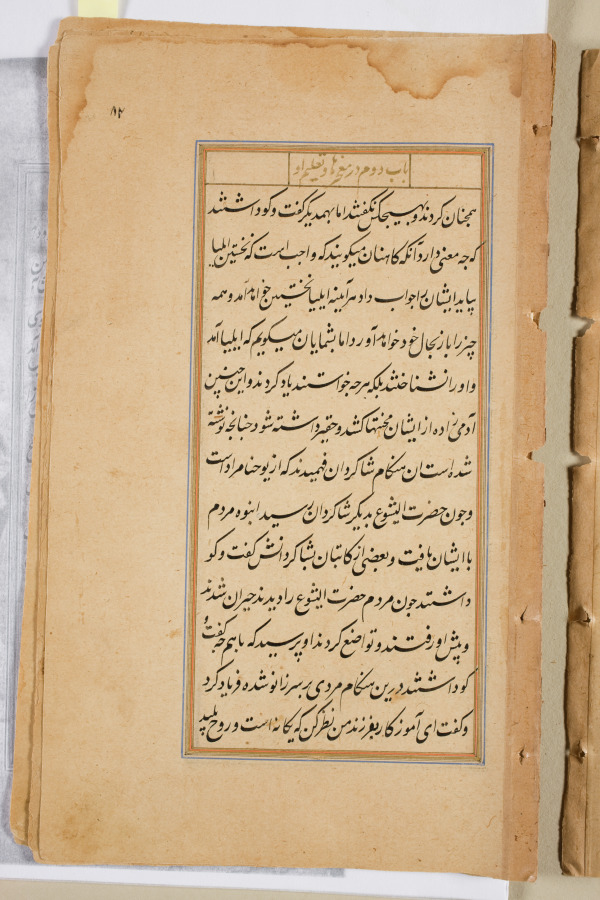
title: Text page from a Mirror of Holiness (Mir’at al-quds) of Father Jerome Xavier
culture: Mughal India, Allahabad, made for Prince Salim (1569–1627)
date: 1602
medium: Ink and gold on paper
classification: Manuscript